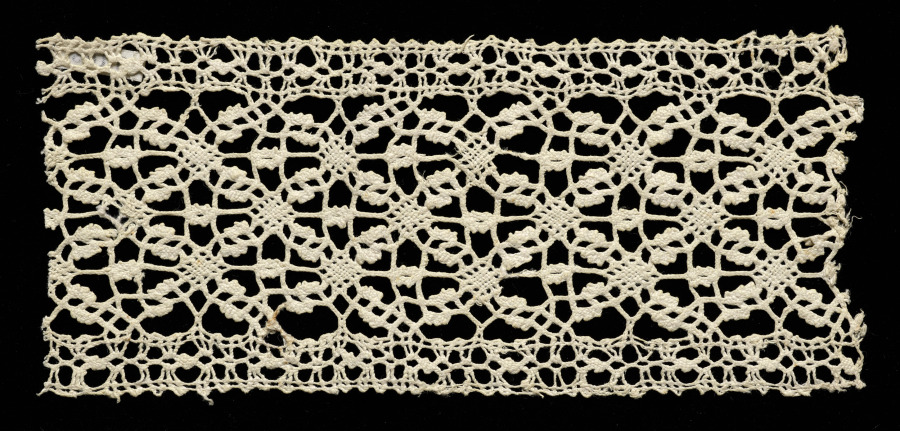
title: Lace Insertion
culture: Italy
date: 1600s–1700s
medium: Bobbin lace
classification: Lace